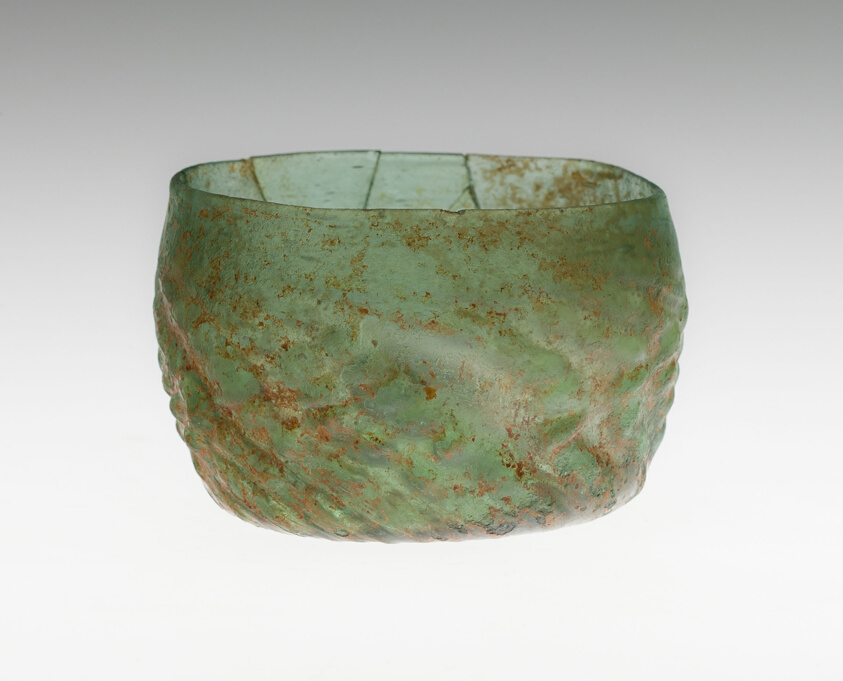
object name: Glass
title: Drinking Cup (Maigelein)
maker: German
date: 1350/1450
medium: Green glass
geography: Germany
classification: glass; european decorative arts; decorative arts